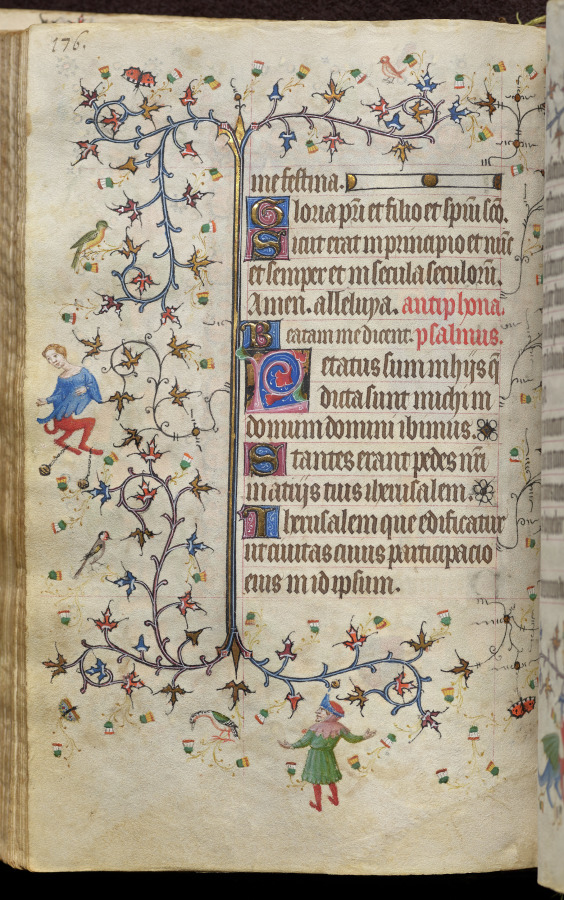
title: Hours of Charles the Noble, King of Navarre (1361-1425): fol. 88v, Text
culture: France, Paris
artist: Master of the Brussels Initials and Associates (French)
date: c. 1405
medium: ink, tempera, and gold on vellum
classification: Bound Volume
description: This precious volume was obviously highly prized by its owner, the French-born King of Navarre, who had his coat of arms painted on no less than twenty folios. Rather than directly commissioning this manuscript from a specific workshop, it seems that Charles the Noble acquired his book of hours -- perhaps ready-made for the luxury market -- while on a trip to Paris in 1404-05. A collaborative effort, six painting styles are evidenced within the pages of this codex, those of two Italians, two Frenchmen, and two Netherlanders. The painter who was responsible for the planning and decoration of the book, and who produced seventeen of the large miniatures, was a Bolognese artist known as the Master of the Brussels Initials. His principal assistant, responsible for most of the borders, was a Florentine who signed his name "Zecho" da Firenze on folio 208 verso.